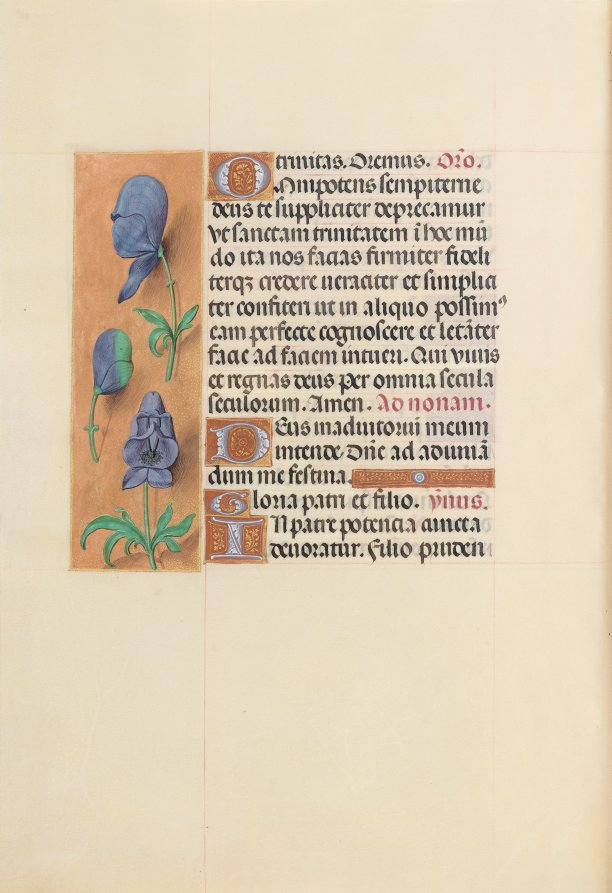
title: Hours of Queen Isabella the Catholic, Queen of Spain: Fol. 20v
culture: Flanders, Ghent and Bruges, late 15th century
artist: Master of the First Prayerbook of Maximillian (Flemish, c. 1444–1519)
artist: and Associates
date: c. 1500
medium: ink, tempera, and gold on vellum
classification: Bound Volume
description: This manuscript was illuminated by a circle of at least five highly organized manuscript painters active in the Flemish cities of Ghent and Bruges. The principal illuminator was Alexander Bening, who painted the majority of the book's miniatures. Manuscripts produced by this circle of artists are renowned for the decoration of their borders, which typically feature a rich variety of realistically-painted flowers, birds, and butterflies. This prayer book, called a book of hours, was intended not for a cleric, but for the private devotions of a lay person-in this case, Isabella the Catholic, Queen of Spain (1451-1504). Isabella's coat of arms embellishes the book's frontispiece. It is unlikely that the book was commissioned by the Queen herself; rather, she probably received it as a diplomatic gift from someone courting her patronage, perhaps Cardinal Francisco Jimenez de Cisneros. A Franciscan friar, Jimenez was dependent upon Isabella for his advancement, first to the post of Queen's confessor in 1492, and then to Archbishop of Toledo in 1495.